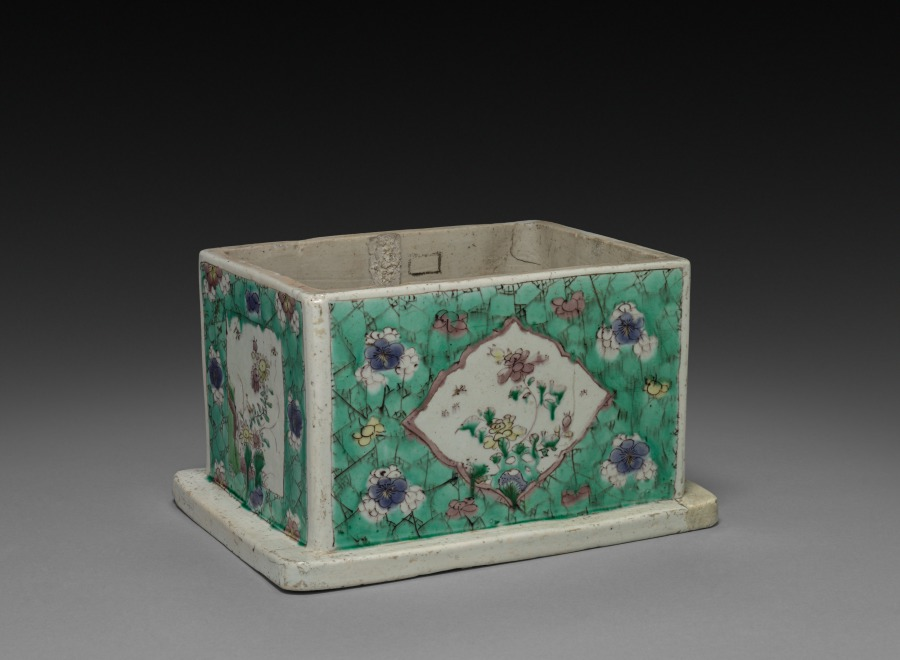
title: Lion (base)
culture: China, Qing dynasty (1644-1911), Kangxi reign (1661-1722)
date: 1662–1722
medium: porcelain with overglaze enamel decoration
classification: Sculpture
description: This porcelain lion is a pair with 1930.643. The female is with a cub, while the male lion holds a ball. Guardian lions were traditionally placed in front of buildings to protect from harmful spiritual or human forces.